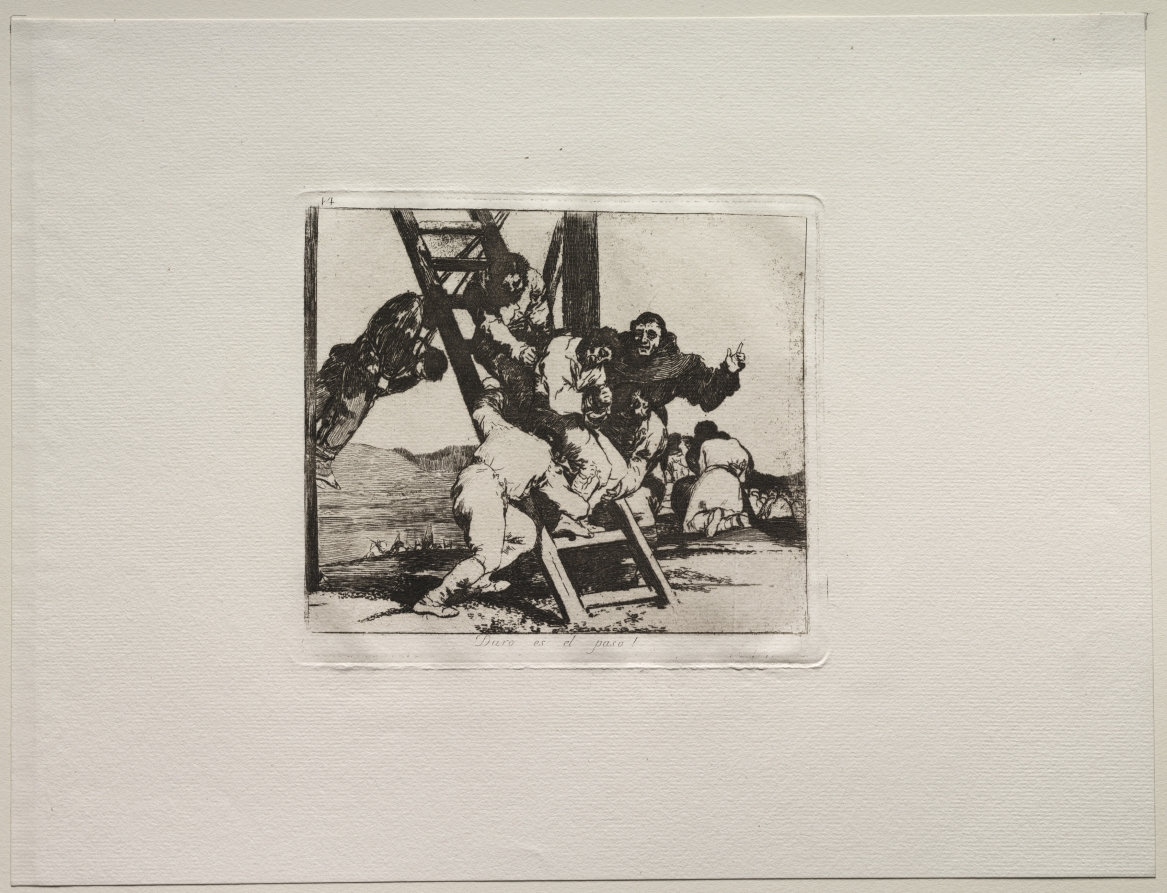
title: The Horrors of War: It's a Hard Step!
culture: Spain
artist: Francisco de Goya (Spanish, 1746–1828)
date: c. 1810–20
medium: etching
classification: Print